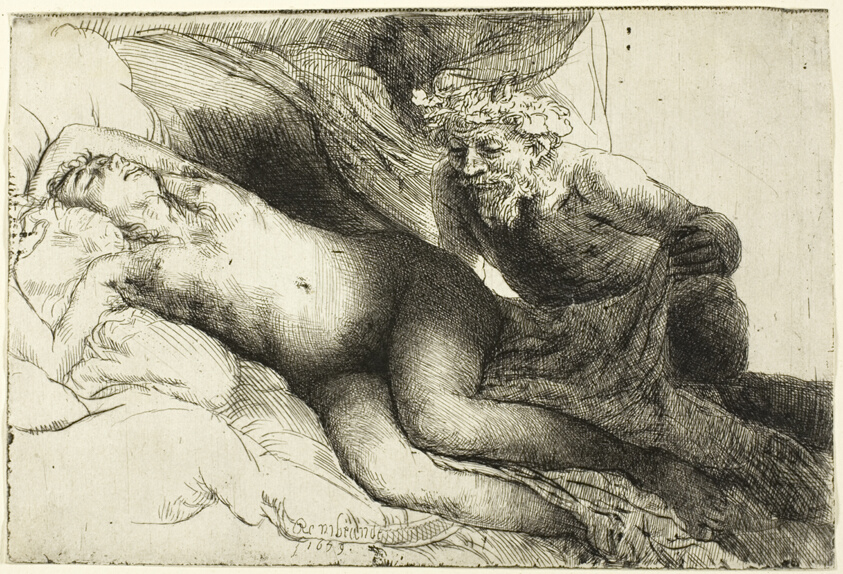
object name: Print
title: Jupiter and Antiope: The Larger Plate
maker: Rembrandt van Rijn (Dutch, 1606-1669)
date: 1659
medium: Etching, drypoint, and burin on off-white laid paper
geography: Holland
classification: etching; print; prints and drawing; paper; drypoint; burin